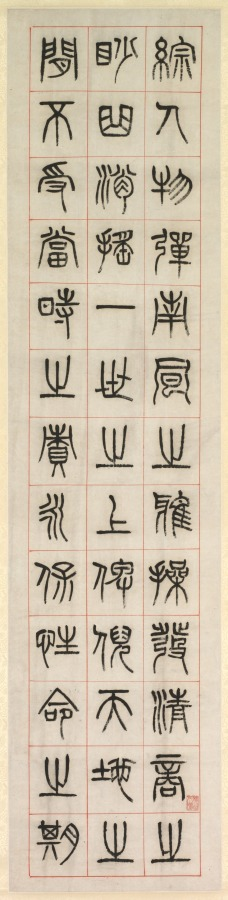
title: On Happiness, Calligraphy in Seal Script Style (zhuanshu)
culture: China, Changsu, Qing dynasty (1644-1911)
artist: Yang Yisun (Chinese, 1813–1881)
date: 1871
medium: hanging scroll, ink on paper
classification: Painting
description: Yang Yisun transcribed this ancient text on six narrow scrolls, starting at the top right and ending at the bottom left. Yang emphasizes the text’s historic nature by using the seal script style found on stone steles and bronze vessels. On Happiness features reflections of a scholar on a leisurely life in the countryside, composed by Han dynasty official Zhongchang Tong, who died the year the Han dynasty collapsed (AD 220). The idyllic life described in the text may bean evocation of the past in a time of national crisis. A decade before Yang wrote these scrolls, Anglo-French forces had looted and burned the Summer Palace in Beijing. At the same time, the domestic Taiping rebellion (1850–64), led by a religious fanatic to overthrow the Qing government, had devastated Yang’s homeland, the Jiangnan region, with an estimated 20 million lives lost.